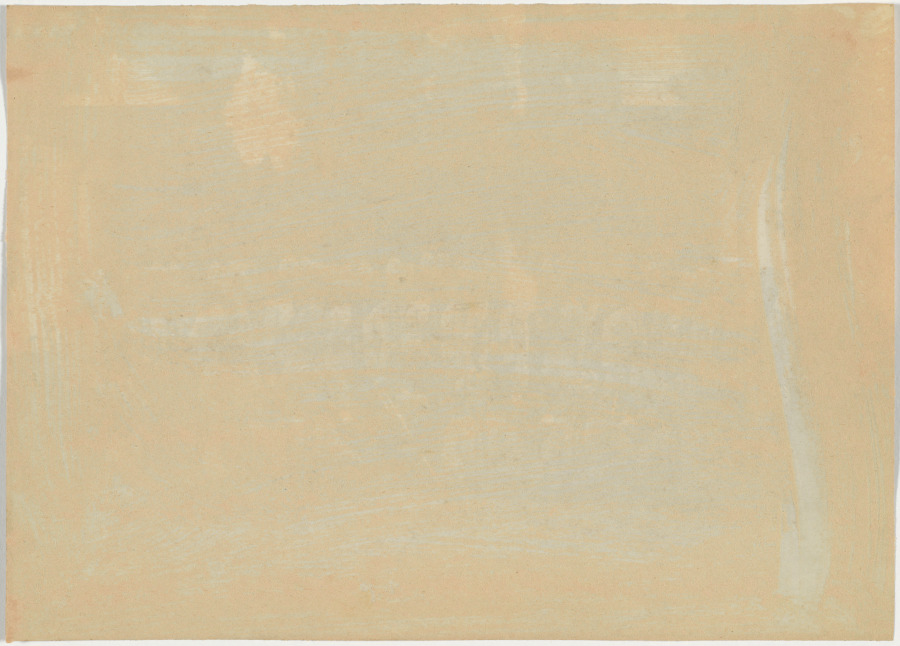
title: Detachment of Bhopal Battalion at Indore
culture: India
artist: Raja Deen Dayal (Indian, 1844–1905)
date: 1886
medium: albumen print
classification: Photograph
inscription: No visible inscriptions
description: In state and military portraits, people seated in chairs and in the middle are generally of the highest rank. Amid these Indian soldiers sits a lone British officer. The Bhopal Battalion had seen combat just six years earlier during the Second Anglo-Afghan War, helping to keep Afghanistan a British-friendly buffer against Russia’s desire to expand into India. This detachment includes a number of Sikhs, identifiable by their neatly trimmed beards and turbans that cover their ears. Members of that religious group were avidly recruited by the British Indian Army due to their reputed ferocity and courage in battle.